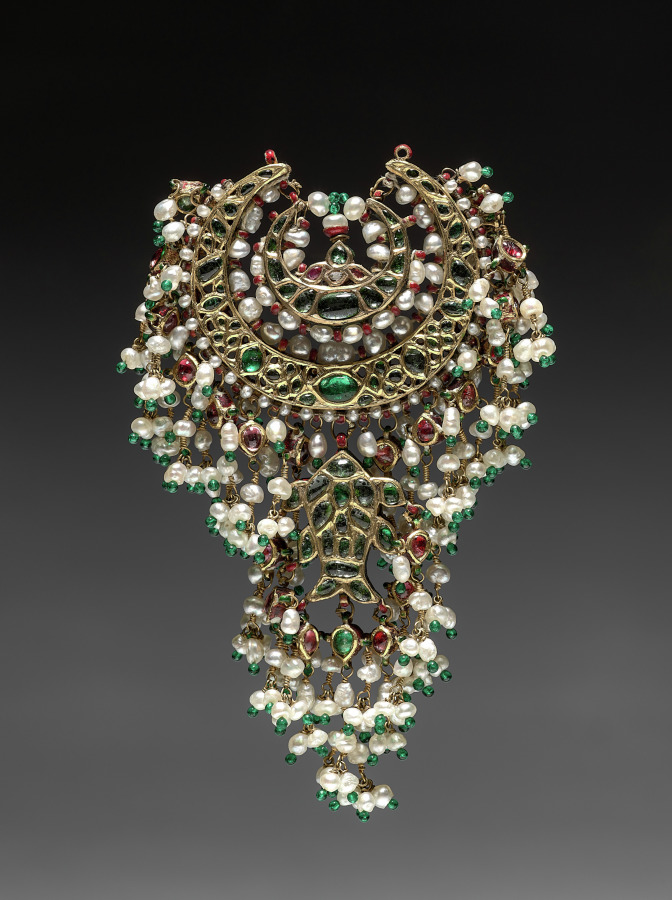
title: Pendant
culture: India, Delhi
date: 1800s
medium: Gilt silver with diamonds, emeralds, rubies, pearls, and enamel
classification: Jewelry